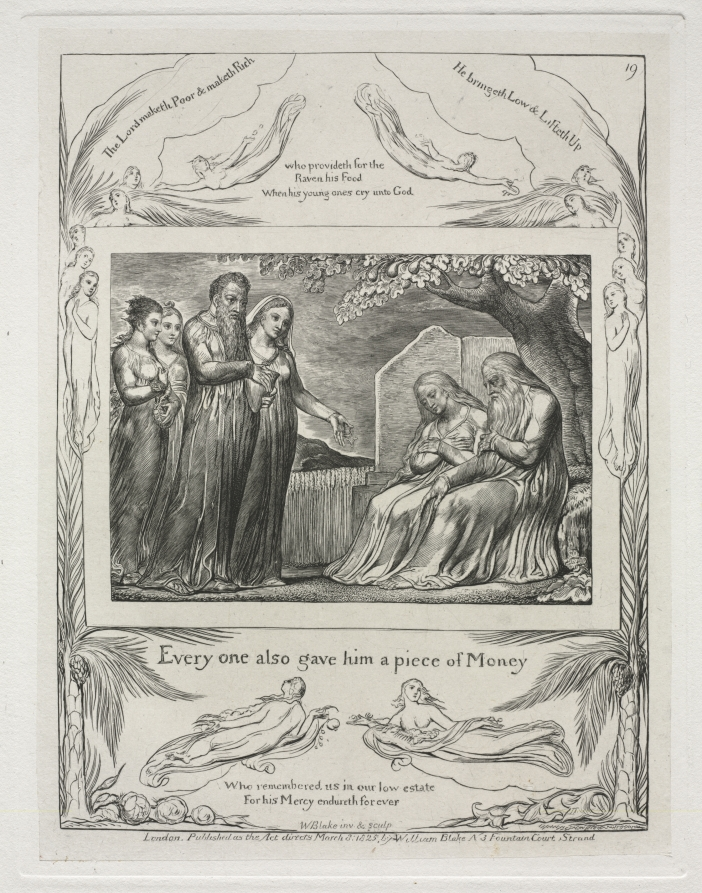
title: The Book of Job: Pl. 19, Every one also gave him a piece of money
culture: England, 19th century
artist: William Blake (British, 1757–1827)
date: 1825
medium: engraving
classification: Print